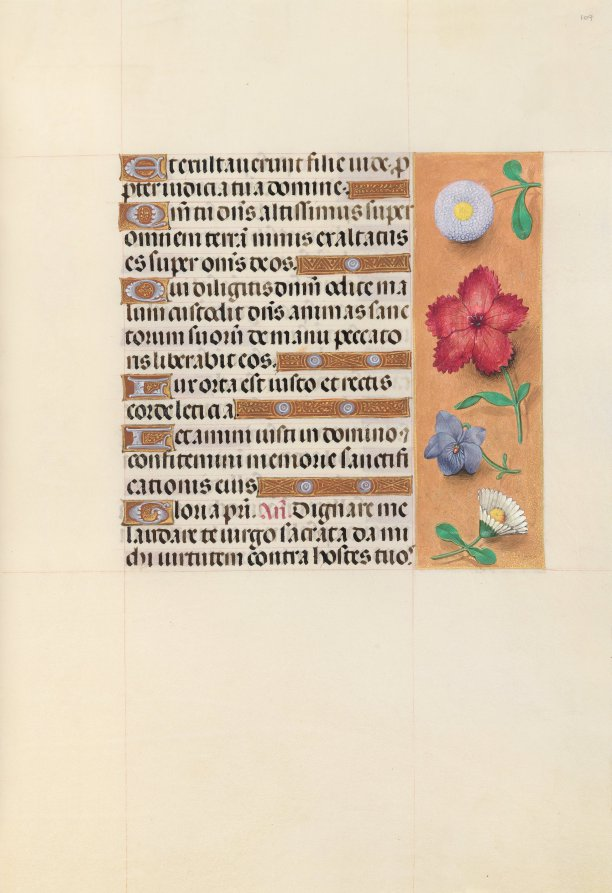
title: Hours of Queen Isabella the Catholic, Queen of Spain: Fol. 109r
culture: Flanders, Ghent and Bruges, late 15th century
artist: Master of the First Prayerbook of Maximillian (Flemish, c. 1444–1519)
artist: and Associates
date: c. 1500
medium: ink, tempera, and gold on vellum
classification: Bound Volume